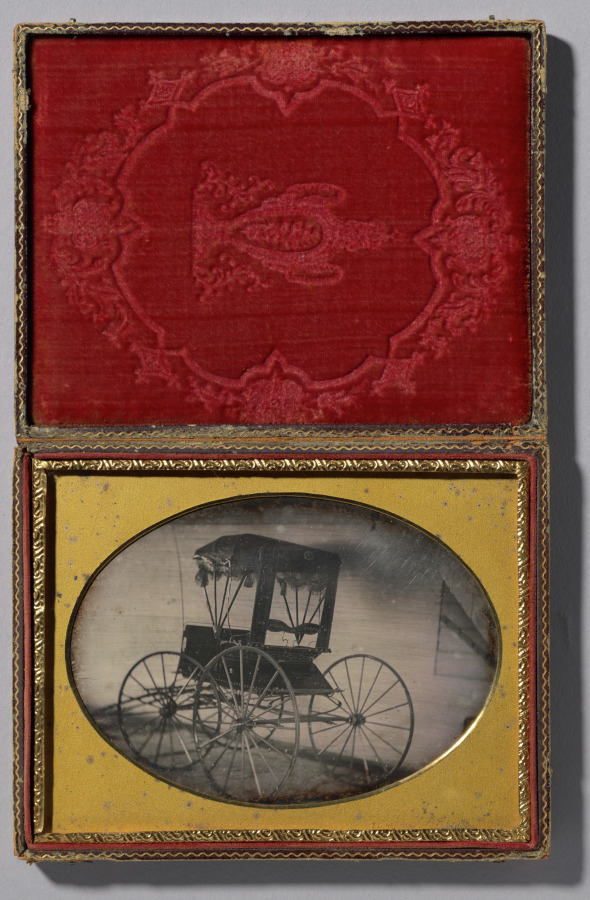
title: Buggy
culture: America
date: c. 1853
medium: daguerreotype, half-plate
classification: Photograph